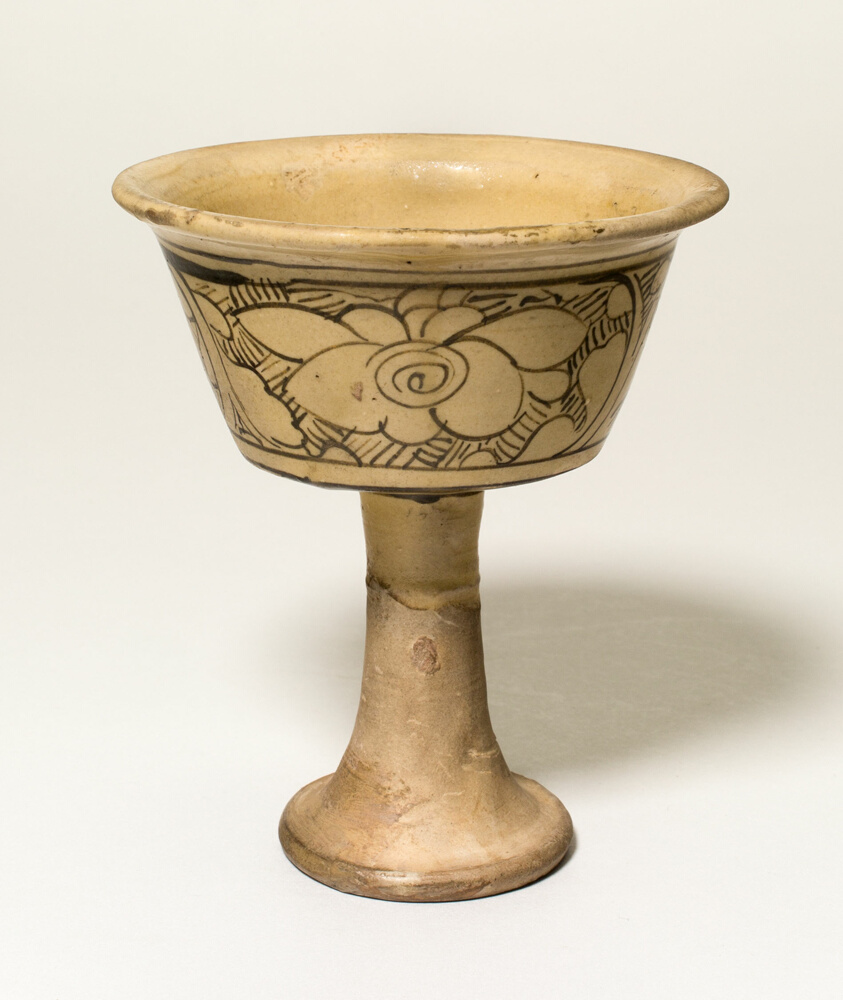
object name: Vessel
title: Stem Cup with Flowers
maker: China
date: Yuan dynasty (1271–1368)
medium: Stoneware with white slip and iron-brown glazes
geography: China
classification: stoneware; asian art; ceramics